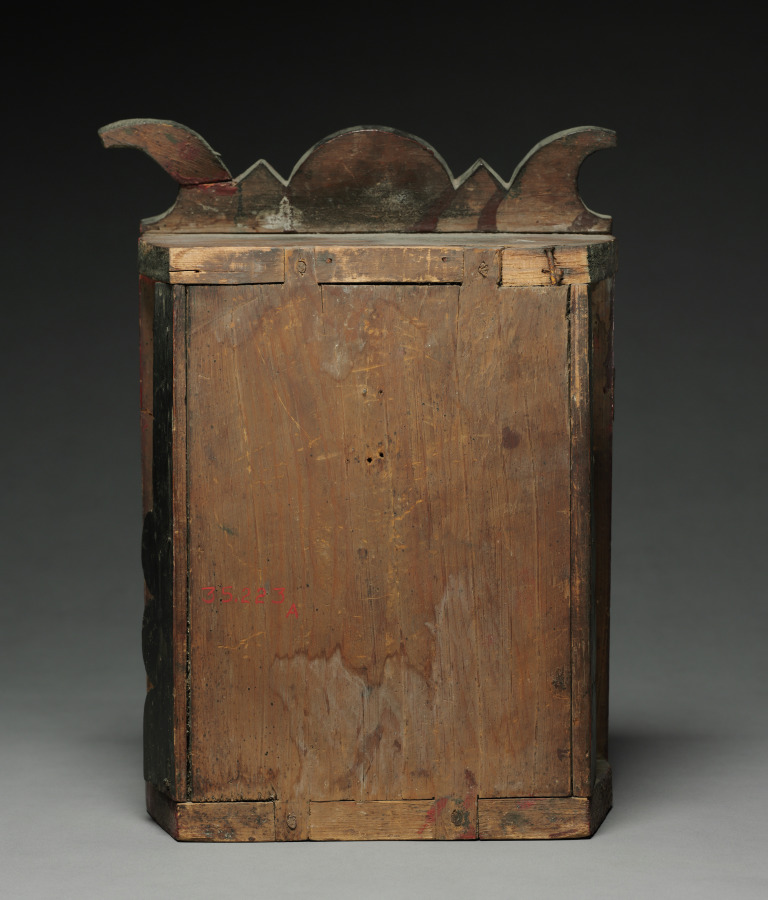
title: Figure with Nicho: santo de bulto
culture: America, New Mexico, 17th-18th century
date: 17th-18th Century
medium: painted wood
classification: Sculpture